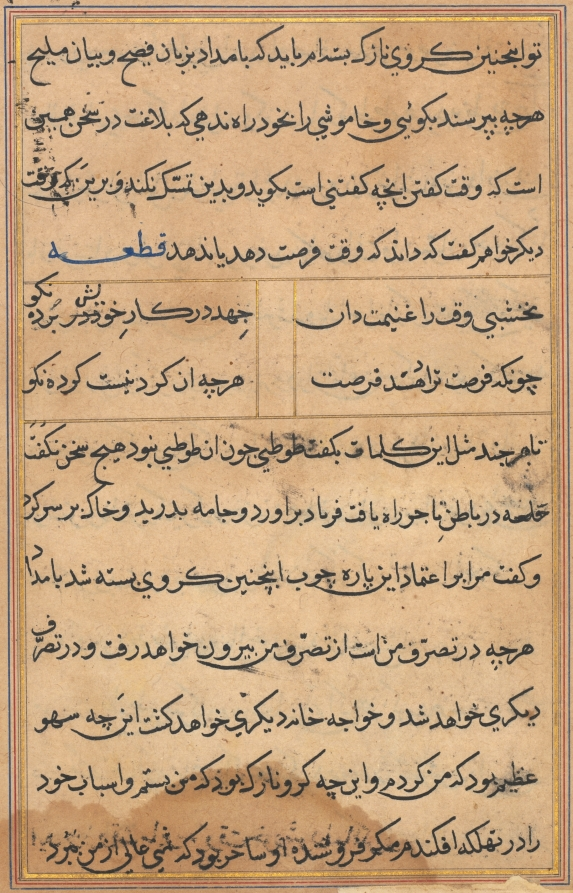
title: Page from Tales of a Parrot (Tuti-nama): text page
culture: Mughal India, court of Akbar (reigned 1556–1605)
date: c. 1560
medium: gum tempera, ink, and gold on paper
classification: Painting